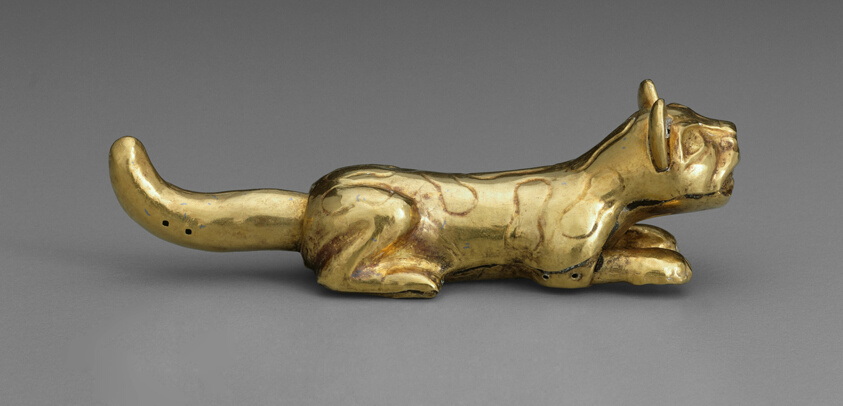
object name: Sculpture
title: Feline Figurine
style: lambayeque, late intermediate period, Pre-Columbian, americas, andes, Arts of the Americas, andean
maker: Moche (Lambayeque Valley, north coast, Peru)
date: 250–550 CE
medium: Gold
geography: Peruvian North Coast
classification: metal; decorative object/ornament; art of the americas; miniature; sculpture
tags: feline, animals